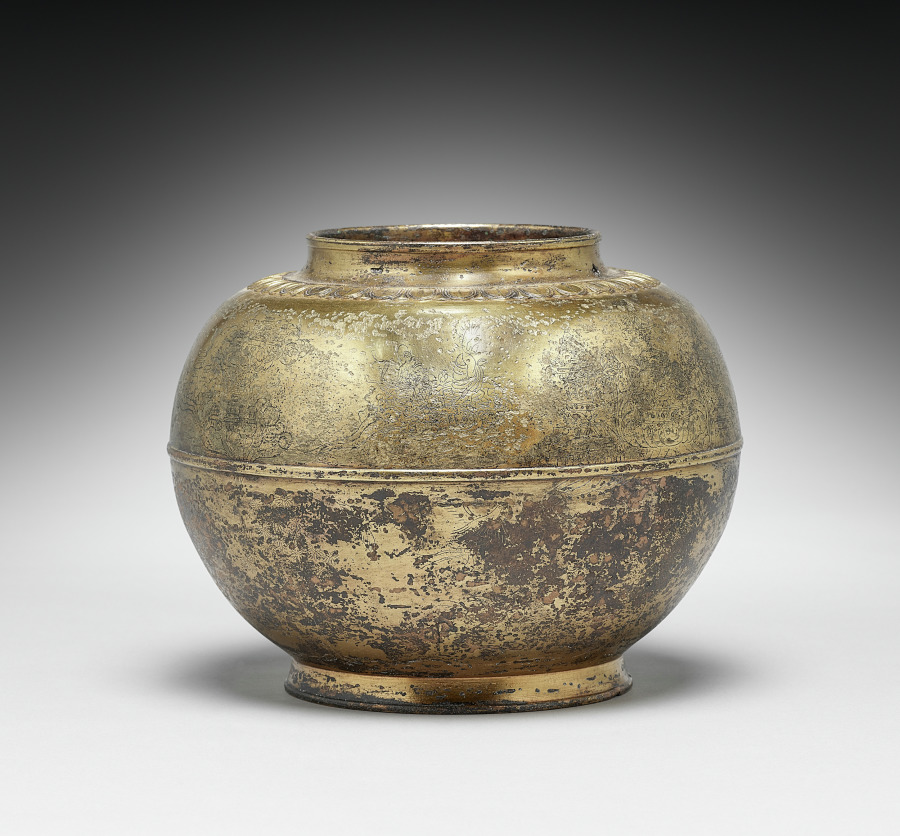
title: Cinerary Urn with Amida’s Pure Land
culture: Japan, Heian period (794–1185)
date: 800s-900s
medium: gilt bronze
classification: Metalwork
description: This urn once held someone’s ashes. It is decorated with images of the Pure Land of Amida, the Buddha of Infinite Life and Light. Heian-period devotees of Amida believed that if they called upon his name with sincerity at the moment of death, they would be born into his Pure Land, also known as the Western Paradise, and thereby escape the pattern of reincarnation. As shown on the lid of the urn, in the Pure Land, musical instruments float about playing by themselves. Its palatial structures and magnificent lotus pond are described on the body of the urn.